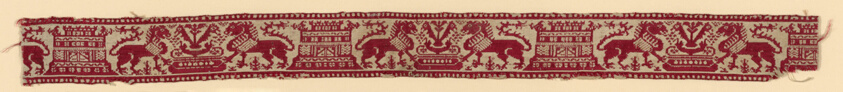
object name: Textile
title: Fragment (Border)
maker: Italy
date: 1601/25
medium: Linen and silk, plain weave; tied double cloth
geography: Italy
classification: textile; weaving